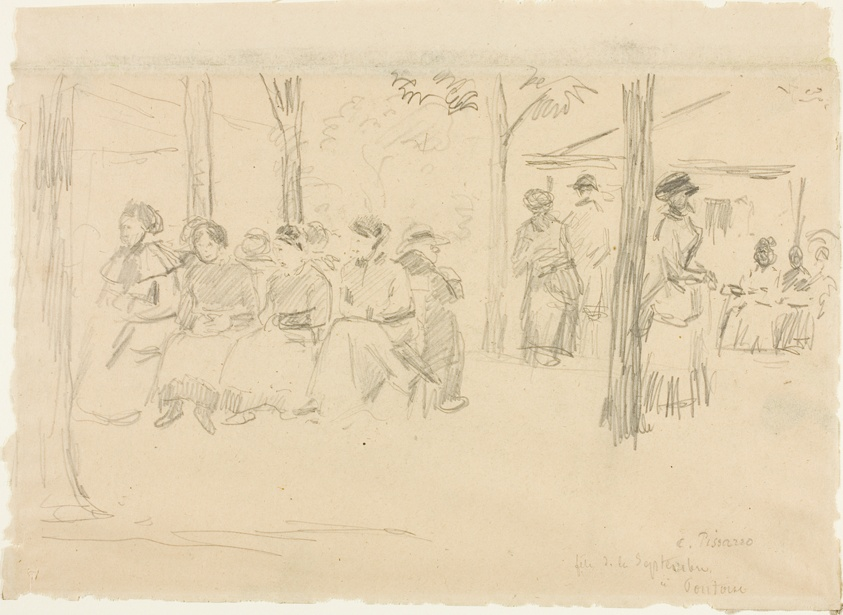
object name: Drawing and Watercolor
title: Fête at Pontoise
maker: Camille Pissarro (French, 1830-1903)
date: c. 1872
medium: Graphite on tan wove paper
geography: France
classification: graphite; drawings (visual works); prints and drawing